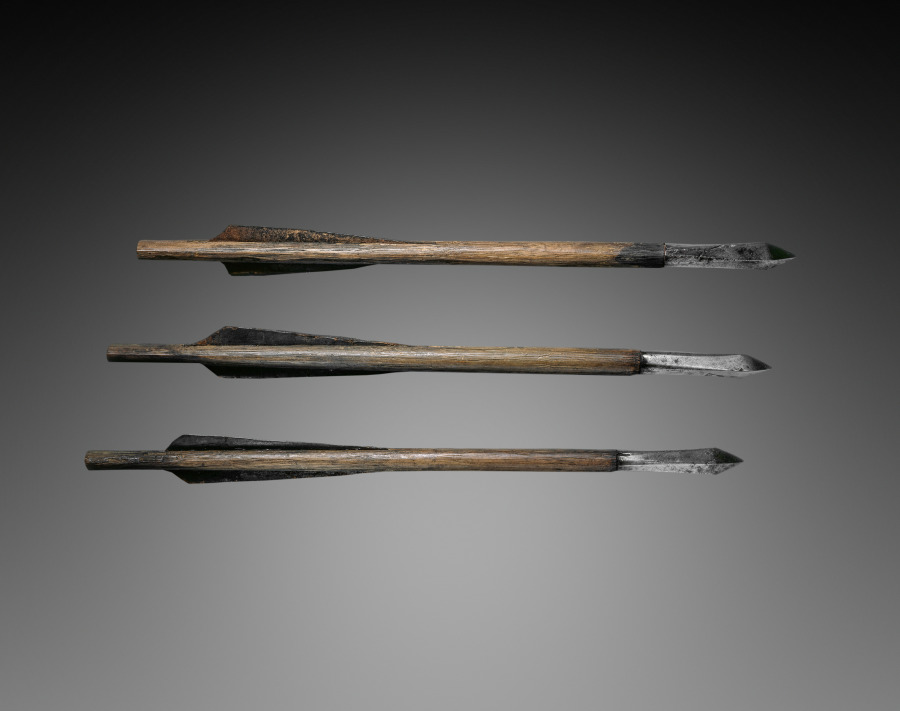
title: Crossbow Bolt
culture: Germany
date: 1500s–1600s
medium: wood, leather, steel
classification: Arms and Armor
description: Also known as a quarrel, crossbow bolts are stockier than arrows, are constructed of durable materials, and can be reused on the field of battle.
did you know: Bolts with leather feathering were used mainly in the Tyrolean area, which includes northern Italy and western Austria.